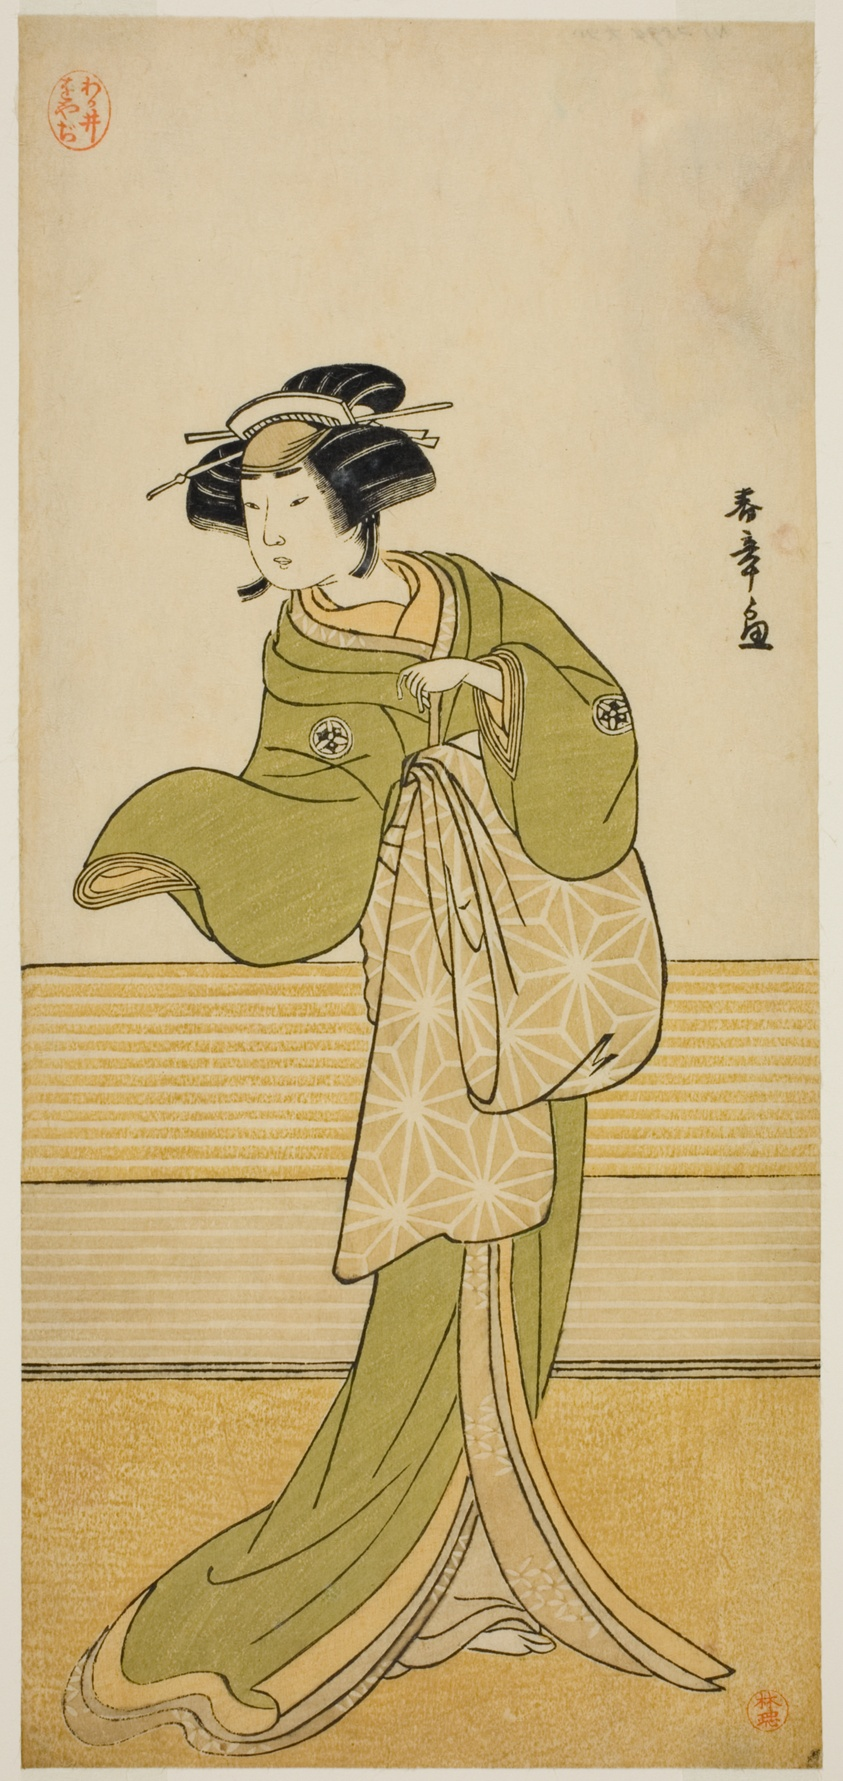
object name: Print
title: The Actor Yamashita Mangiku I in an Unidentified Role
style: Japanese (culture or style)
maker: Katsukawa Shunsho 勝川 春章; Japanese, 1726-1792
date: early 1780s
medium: Color woodblock print; hosoban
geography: Japan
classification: woodblock print; print; asian art